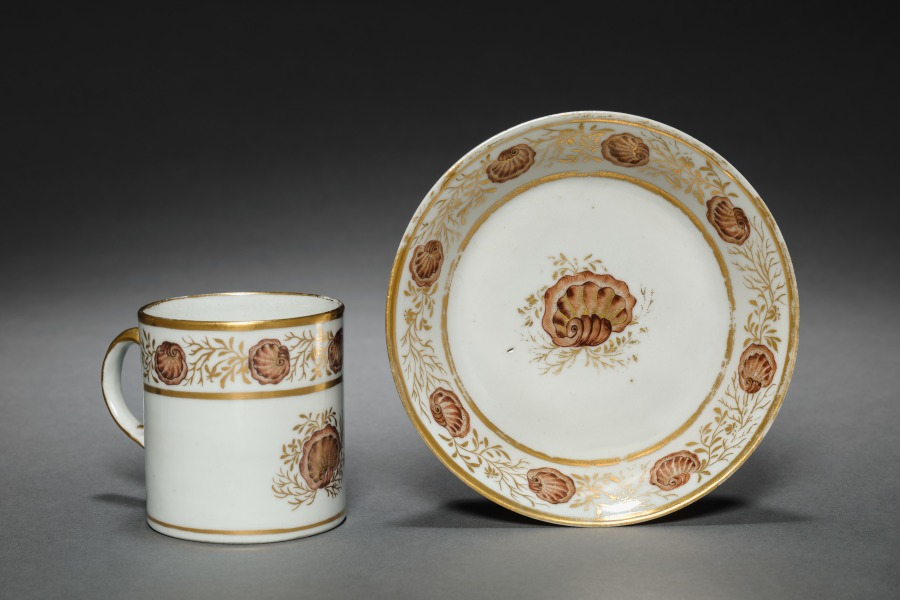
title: Cup from Oliver Wolcott, Jr. Tea Service (4 of 6)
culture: Chinese Export porcelain, late 18th-early 19th century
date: 1785–1805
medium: porcelain, sepia enamel, gold leaf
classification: Ceramic